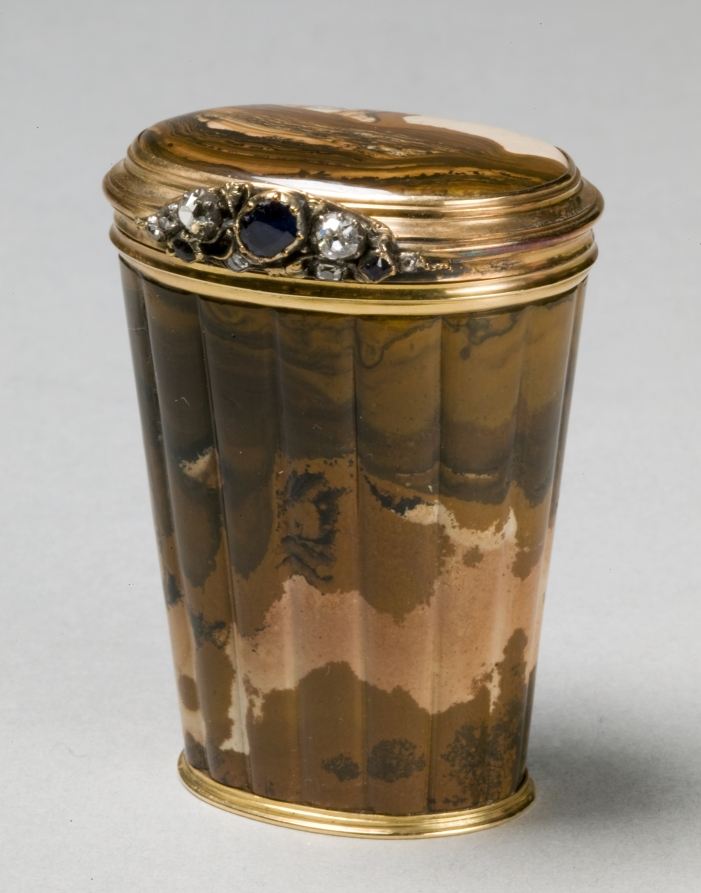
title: Snuff Box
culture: France, late 18th century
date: c. 1760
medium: gold-mounted agate, sapphire, diamonds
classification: Miscellaneous